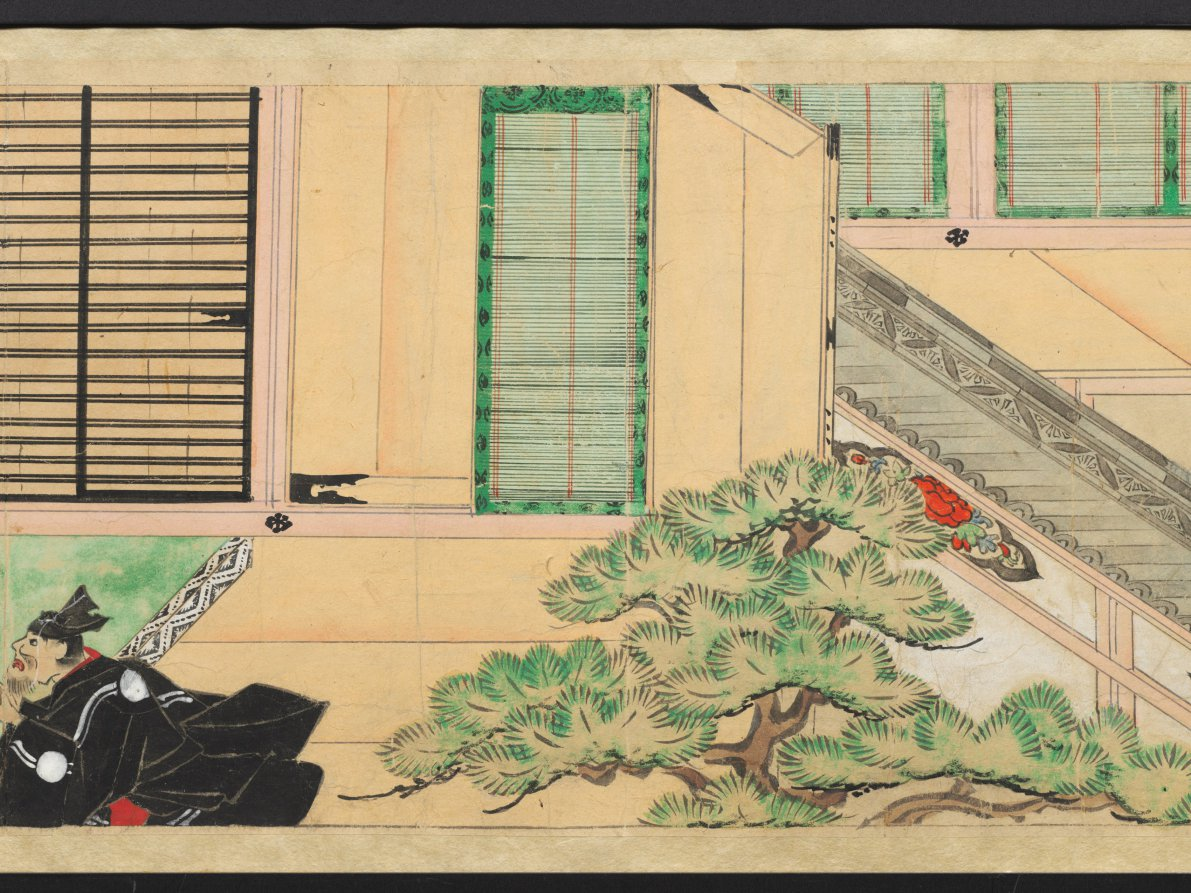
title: The Saltmaker's Story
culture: Japan, Edo period (1615–1868)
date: early 1600s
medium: One of a pair of handscrolls; ink, color, and gold on paper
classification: Painting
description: Once read and copied by girls at New Year’s celebrations and included in dowries, The Saltmaker’s Story is a rags-to-riches tale in which daughters are gifts from the gods. Despite his simple outlook, the main character progresses from humble roots as an associate at Kashima Shrine to the elite status of grandfather of the emperor through the intervention of the Kashima deity. The Saltmaker’s Story is traditionally presented in a set of three scrolls, but the text of this set has been removed by a previous owner, who remounted the illustrations as a pair. The paintings of this one take us from right to left through the second half of the tale.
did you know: This handscroll originally had texts before its paintings, but the texts were removed.